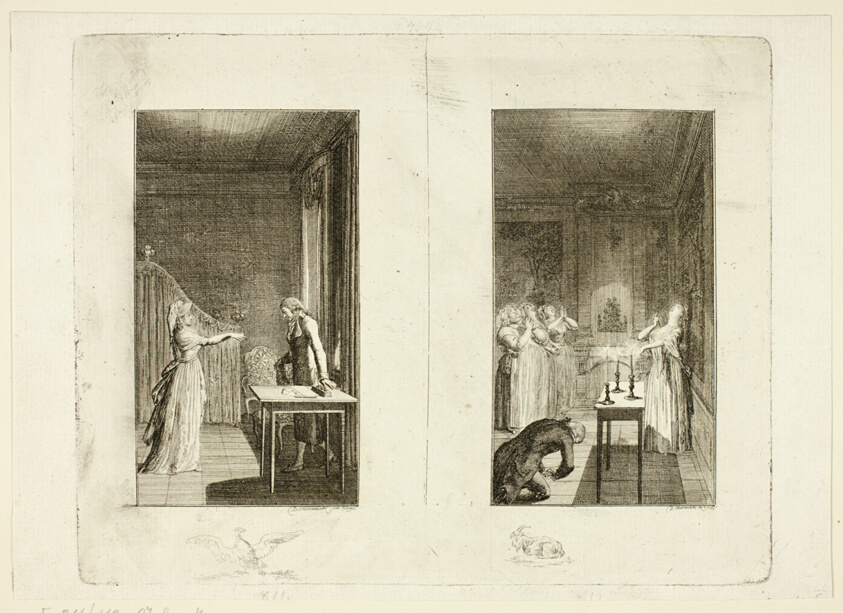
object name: Print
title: Illustration to Samuel Richardson's Clarissa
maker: Daniel Nikolaus Chodowiecki (German, 1726-1801)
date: 1796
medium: Etching on paper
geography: Germany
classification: etching; print; prints and drawing